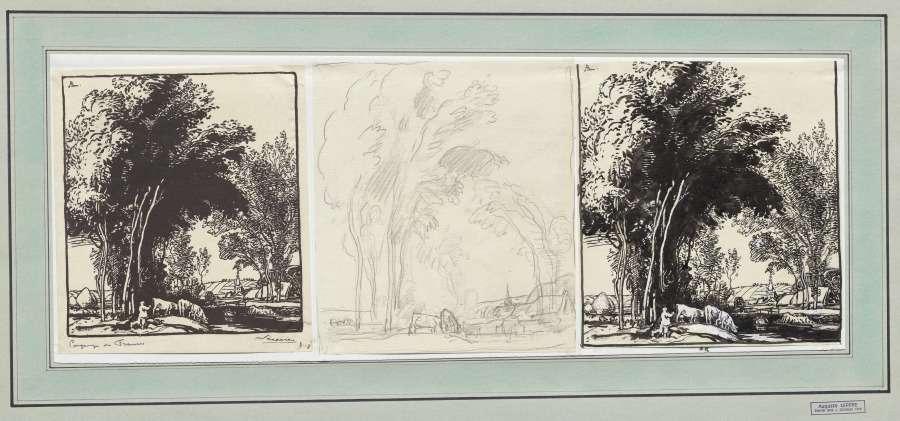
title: Paysage de France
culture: France, 20th century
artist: Auguste Louis Lepère (French, 1849–1918)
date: 1914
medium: brush and black ink over pencil with white highlights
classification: Drawing